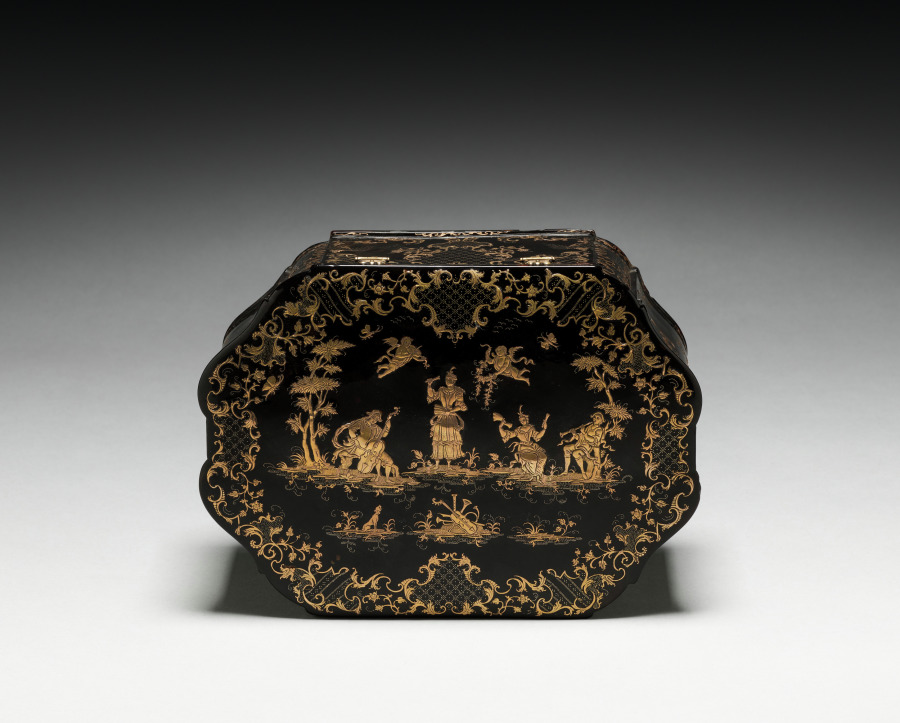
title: Box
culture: Italy, Naples (?), 18th century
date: c. 1750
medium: tortoise shell and gold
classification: Miscellaneous